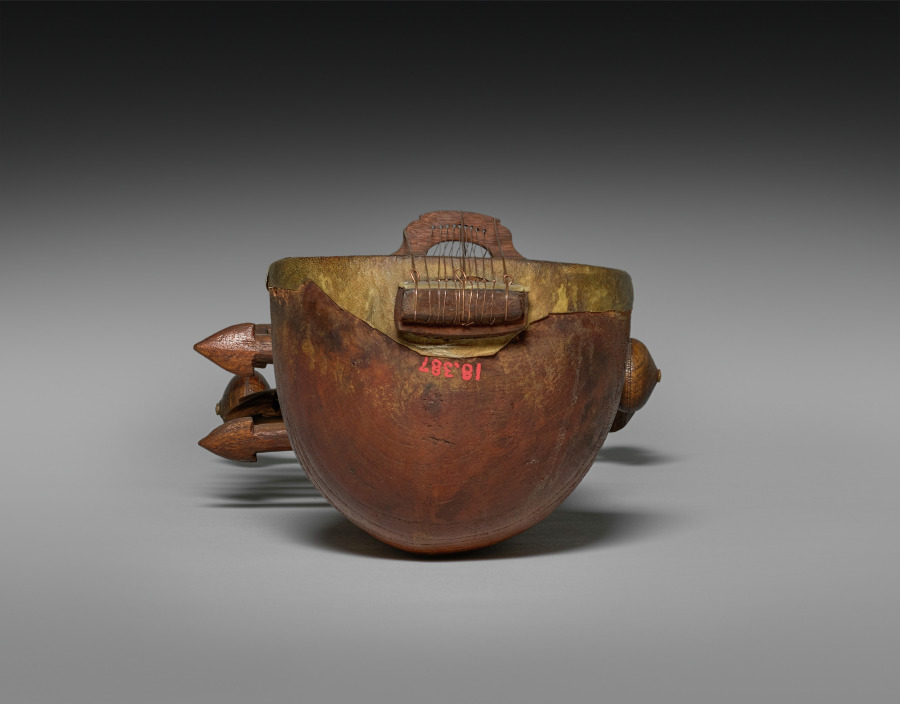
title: Sarangi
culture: India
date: 1800s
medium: Wood with traces of pigment, parchment, bone or ivory, mirrored glass, and copper strings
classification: Musical Instrument